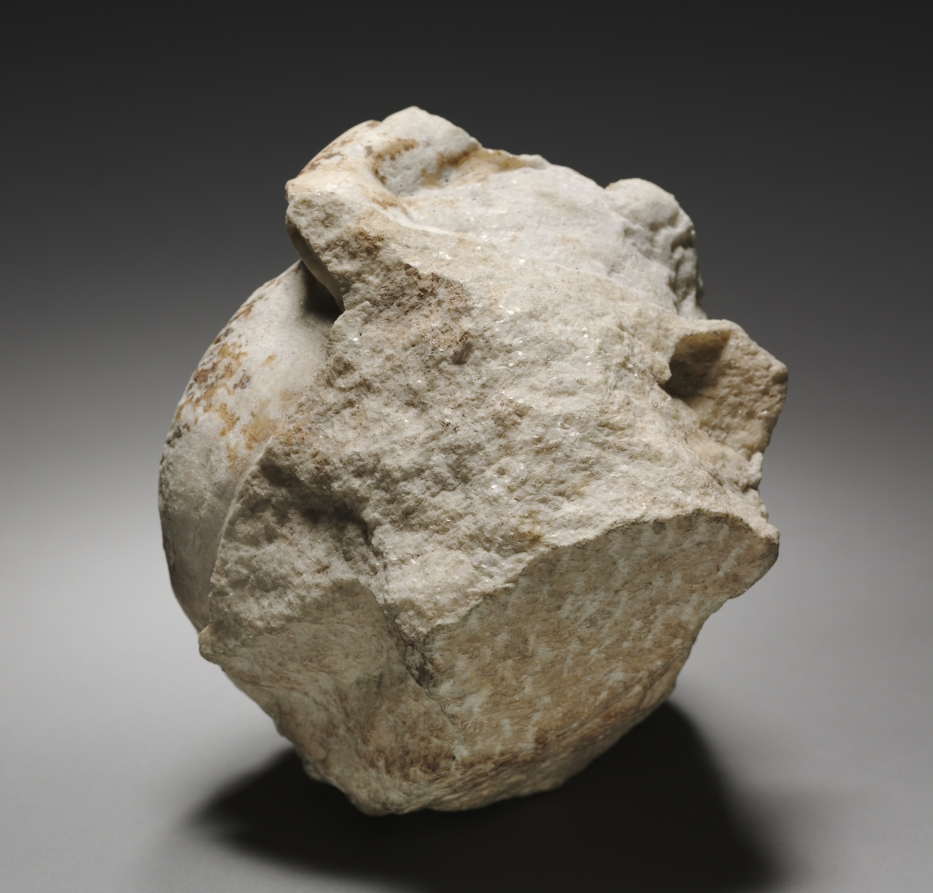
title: Relief Portrait Head of the Emperor Balbinus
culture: Italy, Roman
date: c. 238 CE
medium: marble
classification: Sculpture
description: Wearing a laurel wreath, this head belongs to the little-known Emperor Balbinus, who ruled the empire together with Pupienus for only 99 days in AD 238, the now infamous Year of the Six Emperors. Following his death at the hands of an angry mob, Balbinus and his wife (whose name remains unknown) nevertheless received a large and impressive marble sarcophagus. The couple recline together on the lid, and appear twice in relief on the front, where this head originally belonged. Remarkably, although the head was purchased in Rome in 1925, two years before the sarcophagus was discovered (in many pieces near the Praetextatus Catacombs in Rome), it was found to fit a gap in the larger sculpture in 1966. Since then, a plaster cast of the Cleveland head has remained in place on the original sarcophagus, now in the Vatican Museums.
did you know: Carved in deep relief (not quite in the round), this head comes from a large sarcophagus.